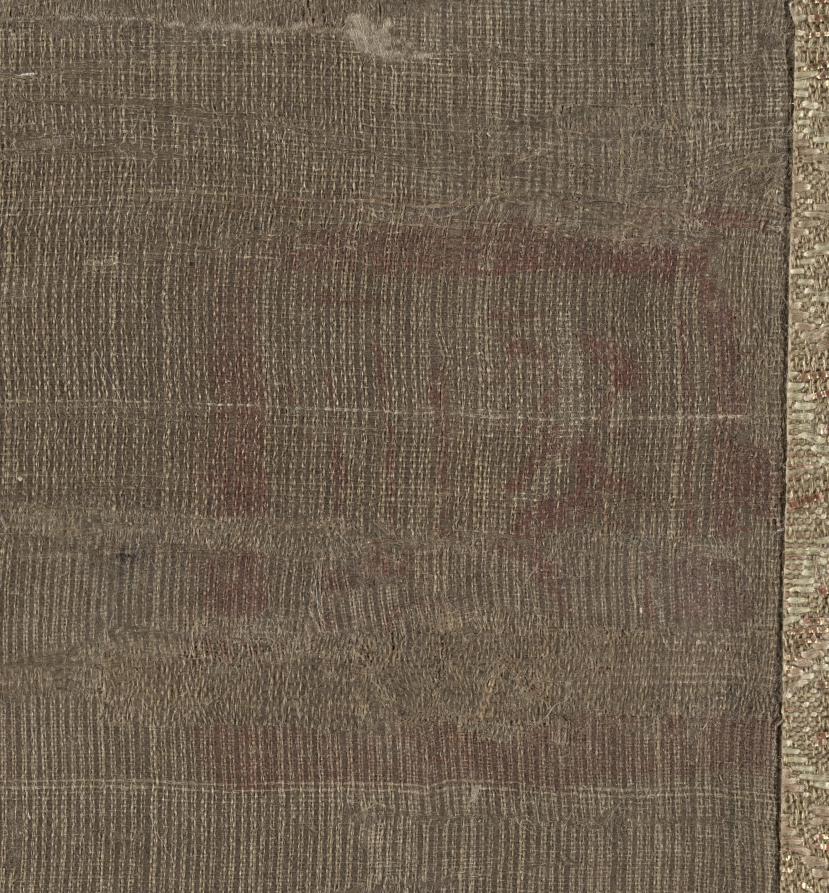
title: Bamboo in Four Seasons: Autumn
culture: China, Yuan dynasty (1271-1368)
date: 1279–1368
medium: hanging scroll, ink on silk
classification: Painting